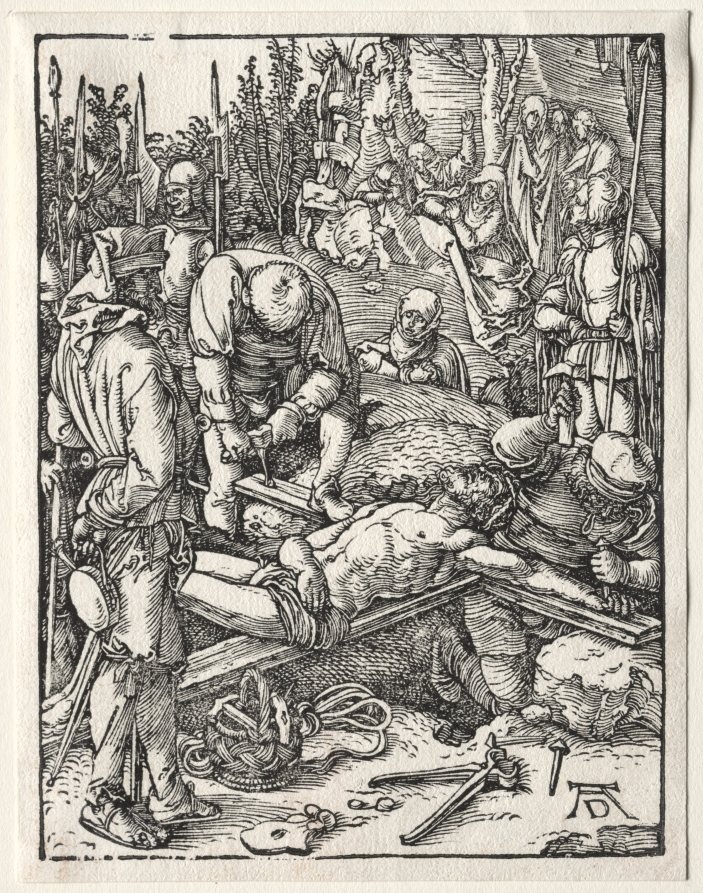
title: The Small Passion: Christ Being Nailed to the Cross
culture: Germany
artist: Albrecht Dürer (German, 1471–1528)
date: 1509–1511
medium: woodcut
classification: Print